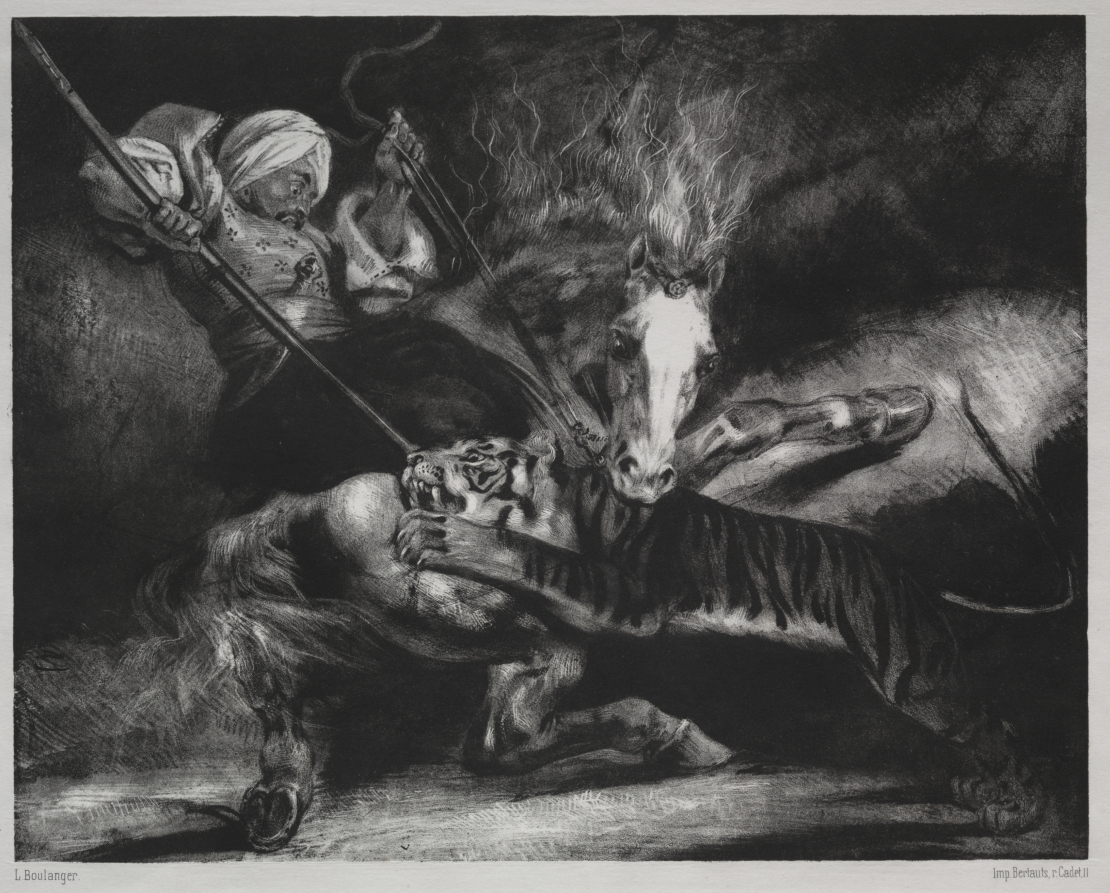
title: An Attack by a Tiger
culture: France, 19th century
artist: Louis Candide Boulanger (French, 1806–1867)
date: 1830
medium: lithograph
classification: Print